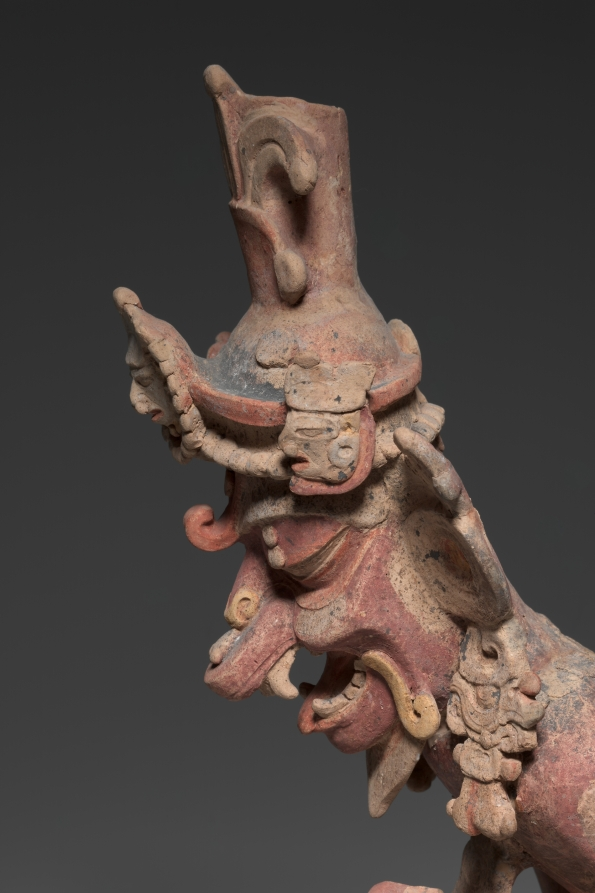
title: Artisan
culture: Guatemala, Petén region, Maya style (250-900), Maya style (250-900)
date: 250–600 CE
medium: earthenware with colored slips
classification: Sculpture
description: These figures represent the supernatural patrons of the visual arts and writing: the brothers Hun Batz and Hun Chuen ("One Monkey" and "One Artisan"). The two were refined artists but also bullies who tormented their younger brothers, who took revenge by transforming their elders into monkeys. Many Maya representations of the painter-scribes immortalize this fate by depicting the pair with both simian and human features, as here. The brothers are shown engaged in artistic or scribal pursuits. Sitting on high-domed bases that may have served as the lids of incense or offering bowls, each apparently once grasped a tool in his upper hand-for instance, a paint brush or a stylus for writing. In the lower hand, one cradles a small mask and the other, a piece of bark that likely refers to the beaten bark from which the Maya made books.